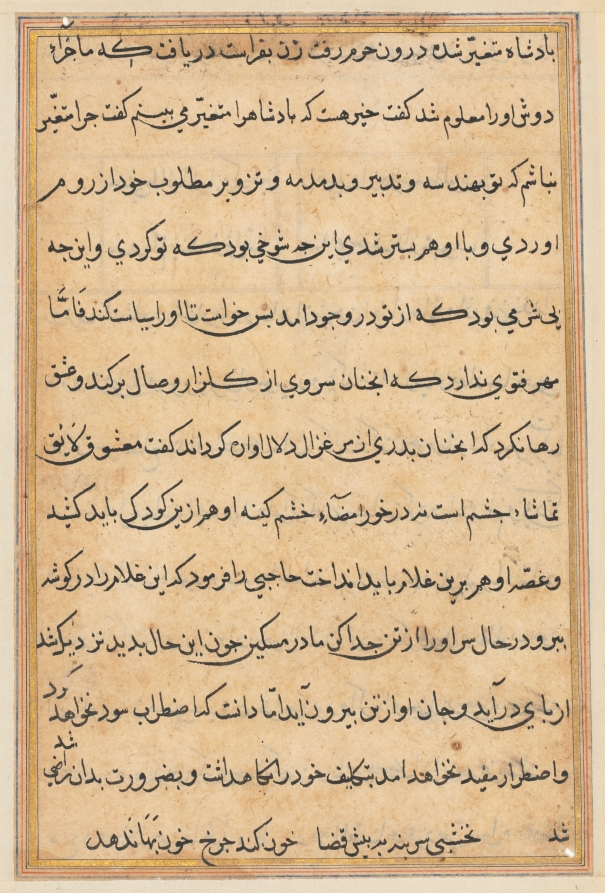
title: Page from Tales of a Parrot (Tuti-nama): text page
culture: Mughal India, court of Akbar (reigned 1556–1605)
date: c. 1560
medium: gum tempera, ink, and gold on paper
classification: Painting